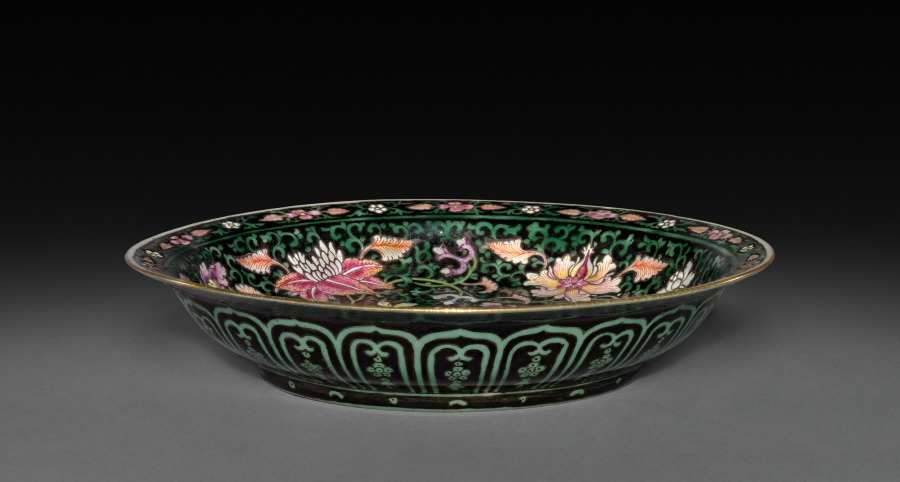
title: Dish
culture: China, Qing dynasty (1644–1911), Qianlong reign (1736–95)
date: 1736–95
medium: porcelain with famille rose overglaze enamel decoration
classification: Ceramic